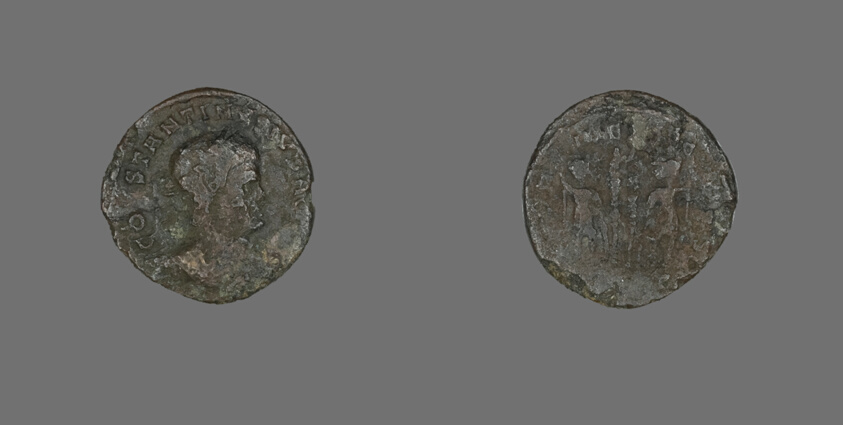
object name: Coin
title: Coin Portraying Emperor Constantine II Caesar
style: roman (ancient, style or period), ancient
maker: Roman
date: 330-336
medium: Bronze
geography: Roman Empire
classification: coin; ancient art